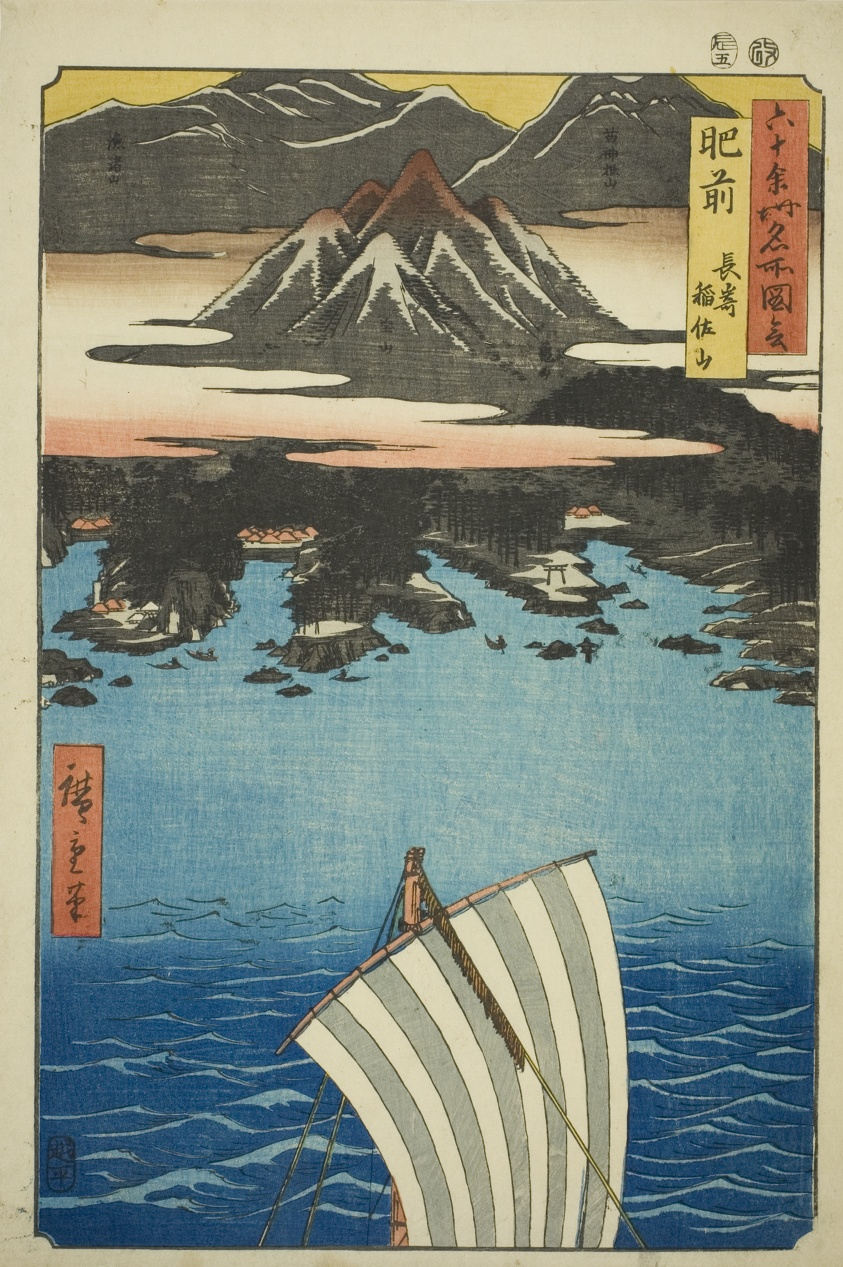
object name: Print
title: Hizen Province: Mount Inasa in Nagasaki (Hizen, Nagasaki Inasayama), from the series "Famous Places in the Sixty-odd Provinces (Rokujuyoshu meisho zue)"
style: Japanese (culture or style)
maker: Utagawa Hiroshige 歌川 広重; Japanese, 1797-1858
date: 1853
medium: Color woodblock print; oban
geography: Japan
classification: woodblock print; print; asian art